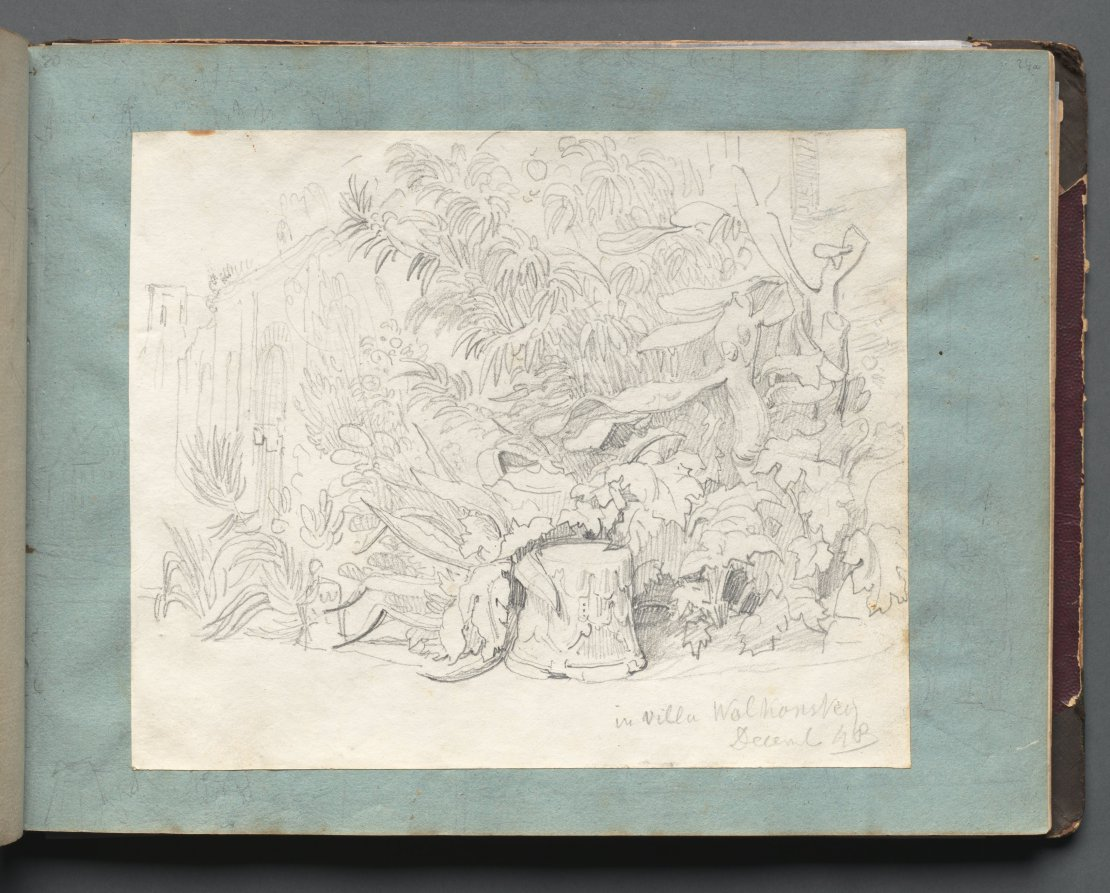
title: Album with Views of Rome and Surroundings, Landscape Studies, page 24a: "In Villa Walkonsky"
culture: Germany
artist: Franz Johann Heinrich Nadorp (German, 1794–1876)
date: c. 1830s-70s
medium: graphite on white paper laid down blue paper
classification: Bound Volume